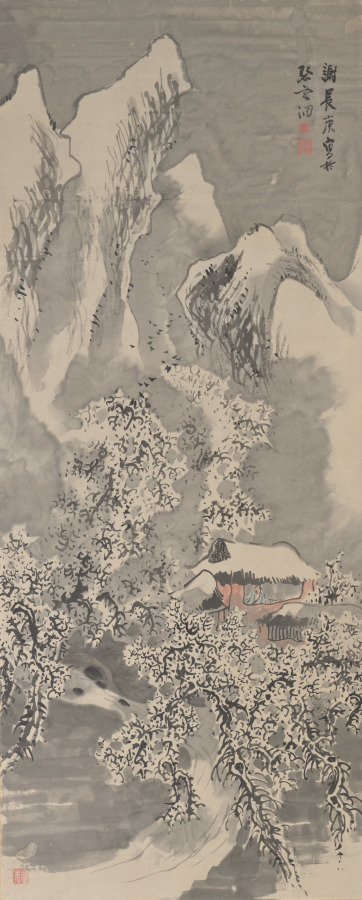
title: Snow Landscape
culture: Japan, Edo period (1615–1868)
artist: Yosa Buson (Japanese, 1716–1783)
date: mid-1770s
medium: hanging scroll; ink and color on paper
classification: Painting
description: In this painting, the mountains and sky glow with a hidden warmth from undertones in red as birds descend into the trees around a scholar’s retreat. Yosa Buson is recognized in Japanese literary history as one of the country’s greatest poets, but he was also an accomplished, self-taught painter. His style changed over the course of his career. Initially painting with precise brushwork, he gradually developed a freer style like the one he used in this snowscape.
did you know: One of the artist's seals reads: "flung ink gives life to brush lines."